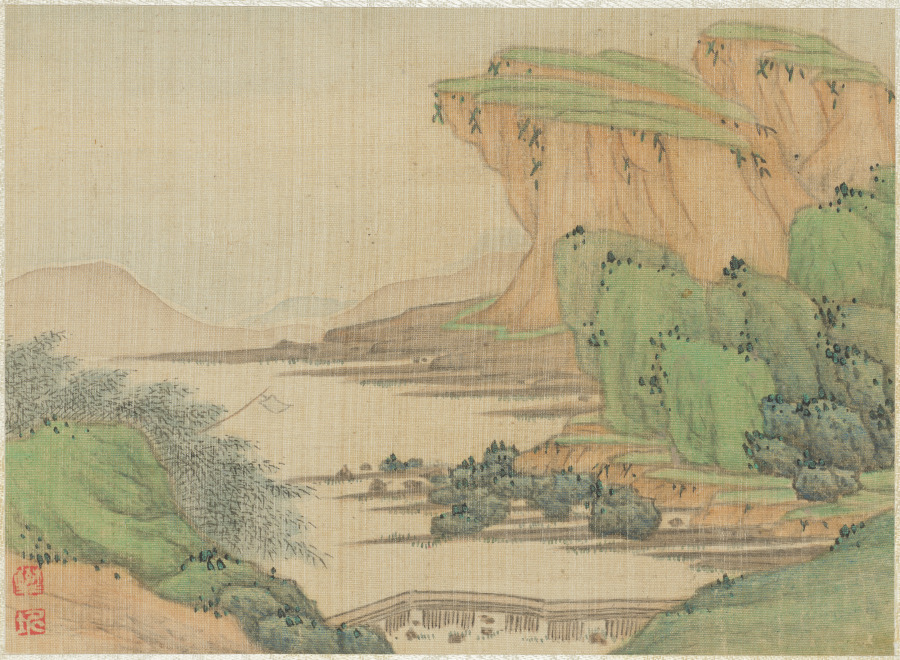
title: Album of Miscellaneous Subjects, Leaf 2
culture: China, Qing dynasty (1644-1911)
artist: Fan Qi (Chinese, 1616–after 1694)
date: early 1650s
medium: album leaf, ink and color on silk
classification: Painting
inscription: Artist seal: Fan Qi 樊圻. Poem by Han Tan 韓菼 (1637–1704): A thousand feet of red cliffs look like a sculptured flower of Fu-yung;/ In one glance, the long bridge joins adjacent ridges./ Furthermore a wine shop stands in a bamboo grove;/ The fellow who bought some good wine is drunk on the eastern shore of the stream.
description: Fan Qi's painting on this second leaf of the album is, perhaps, based on Du Mu's poetic line: The herdboy pointed to the distant Apricot Village. Han Tan's calligraphic colophon facing the painting reads: A thousand feet of red cliffs look like a sculptured flower of furong; In one glance, the long bridge joins adjacent ridges. Furthermore a wine shop stands in a bamboo grove; The fellow who bought some good wine is drunk on the eastern shore of the stream.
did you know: A wine shop's flag is visible above the bamboo grove.